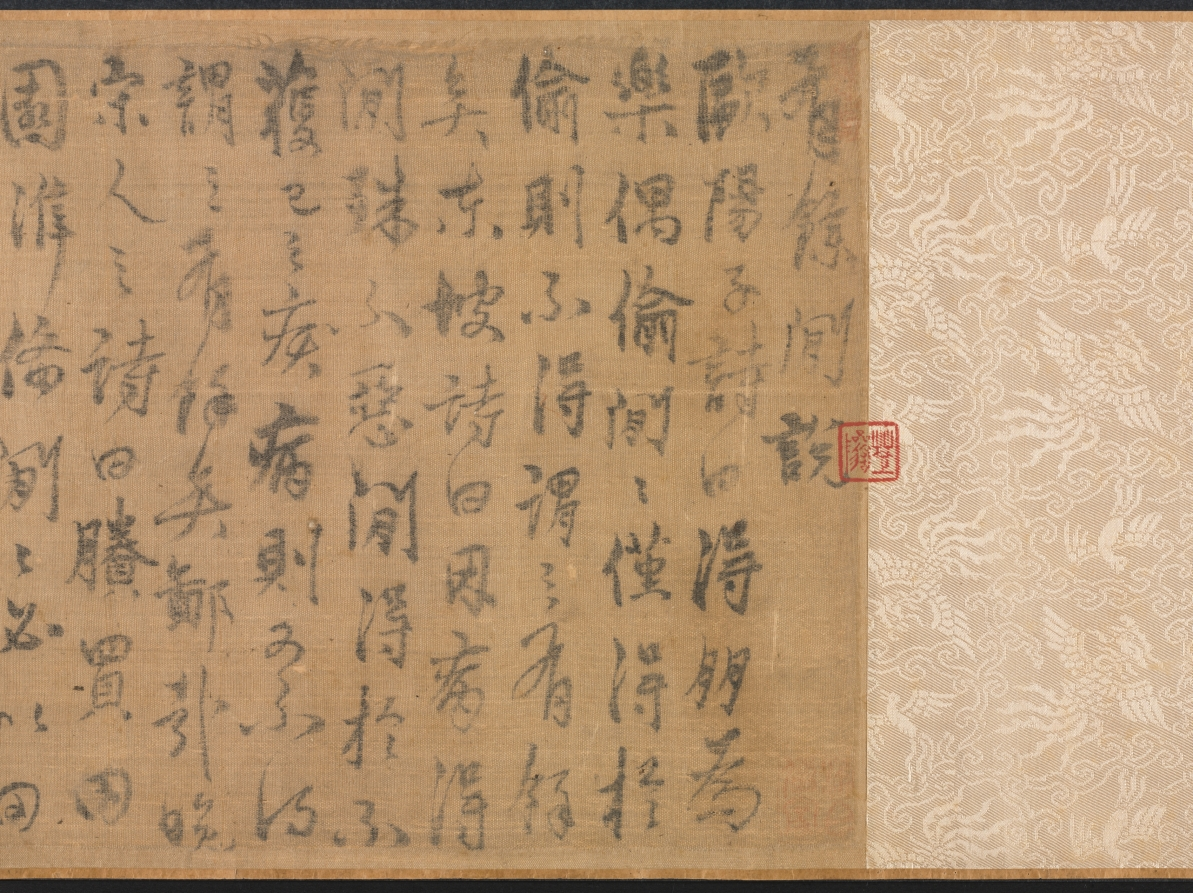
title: Leisure Enough to Spare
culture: China, Yuan dynasty (1271-1368)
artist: Yao Tingmei (Chinese, active mid-1300s)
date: 1360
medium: handscroll, ink on paper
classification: Painting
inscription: 至正廿年春正月_日作此併系鄙語于尾 地偏人遠閉柴關，滿院松陰白晝閒。 眼底風塵渾忘却，坐看流水臥看山。 吳興姚廷美畫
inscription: 23 colophons and 53 seals (dates unavailable for some): 1 colophon, dated 1360, and 2 seals of Yang Weizhen (1296-1370); 1 colophon and 3 seals of Wan Yi; 1 colophon of Zhang Junde; 1 colophon and 3 seals of Angji (act. ca. mid-14th c.); 1 colophon and 1 seal of Xu Shiquan; 1 colophon and 3 seals of Gao Yu; 1 colophon and 2 seals of Li Mingfu; 1 colophon and 2 seals of Lu Lin; 1 colophon and 1 seal of Zhang Qian; 1 colophon of Tao Tangwen; 1 colophon and 1 seal of Wu Yuangui (act. ca. 1300-60); 1 colophon of Bao Jiong; 1 colophon of Wang Zao; 1 colophon and 1 seal of Ma Chuyi; 1 colophon and 1 seal of Lin Yizhuang; 1 colophon and 1 seal of Gu Shunju; 1 colophon and 2 seals of Wang Jing; 1 colophon and 2 seals of Lin Shouchang; 1 colophon and 1 seal of Gao Zhidao; 1 colophon of Lin Xun; 1 colophon, dated 1359, and 2 seals of Meng Weicheng (act. mid-14th c.); 1 colophon and 1 seal of Meng Zhiji (act. mid-l4th c.); 14 seals of Liang Qingbiao 梁清標 (1620-1691); 1 poem dated 1755 and 5 seals of the Qianlong 乾隆 emperor (r. 1736-95); 2 seals of the Jiaqing 嘉慶 emperor (r. 1796-1821); 3 seals of the Xuantong 宣統 emperor (r. 1909-11).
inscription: Title on frontispiece by Zhang Bi 章弼: Signed Gongchen 拱辰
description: Seclusion and leisure—the ideals of the literati, or scholar-gentlemen—are expressed in this mature work by Yao Tingmei. The theme acquired special meaning at a time of the military uprisings near the end of the Yuan dynasty. Dedicated to an ascetic named Du, this work combines painting, calligraphy, and poetry; following the painting are more than 20 poems and essays written by notable scholars, one of whom was the calligrapher Yang Weizhen. It reveals not only the aesthetic taste of the literati but also the practice of contributing artistic and literary works to fulfill social obligations. Yao's painting demonstrates his individual style derived from various ancient masters (Guo Xi, Dong Yuan, and Juran). Yang Weizhen's calligraphy exhibits his bold, vigorous style and his intent to capture the spirit of antiquity in art.